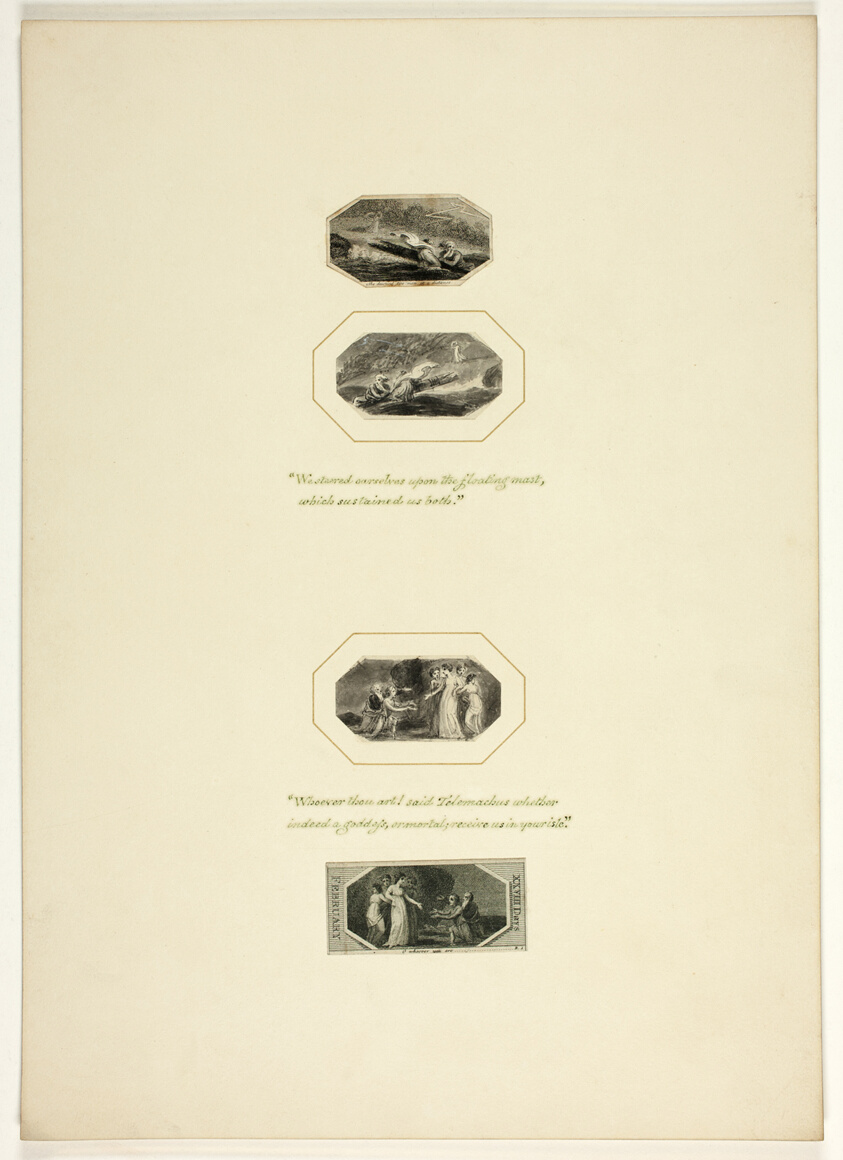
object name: Drawing and Watercolor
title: Study for a plate from Telemachus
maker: Thomas Stothard (English, 1755-1834)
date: c. 1797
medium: Ink wash on paper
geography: England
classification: ink and wash; prints and drawing; paper; drawings (visual works)